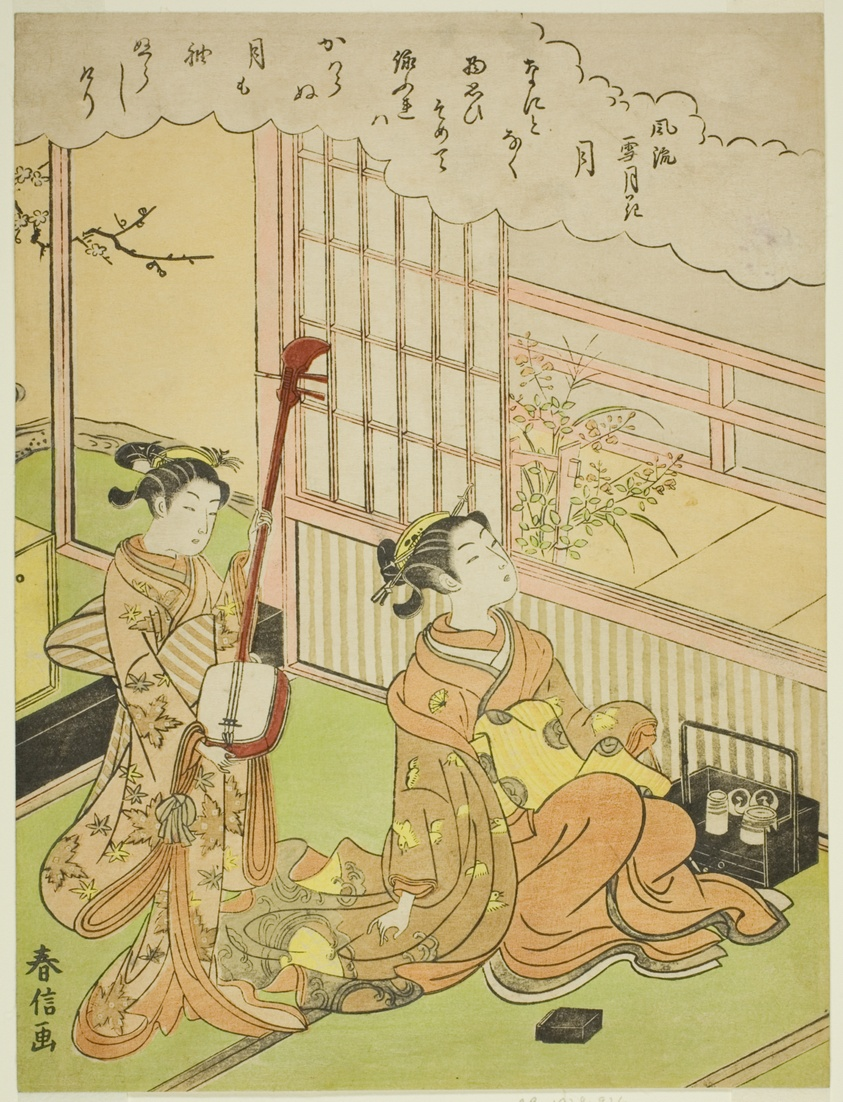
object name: Print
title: The Moon (Tsuki), from the series "Fashionable Scenes of Snow, Moon and Flowers (Furyu setsugekka)"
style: Japanese (culture or style)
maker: Suzuki Harunobu 鈴木 春信; Japanese, 1725 (?)-1770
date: c. 1768/69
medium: Color woodblock print; chuban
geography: Japan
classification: woodblock print; print; asian art